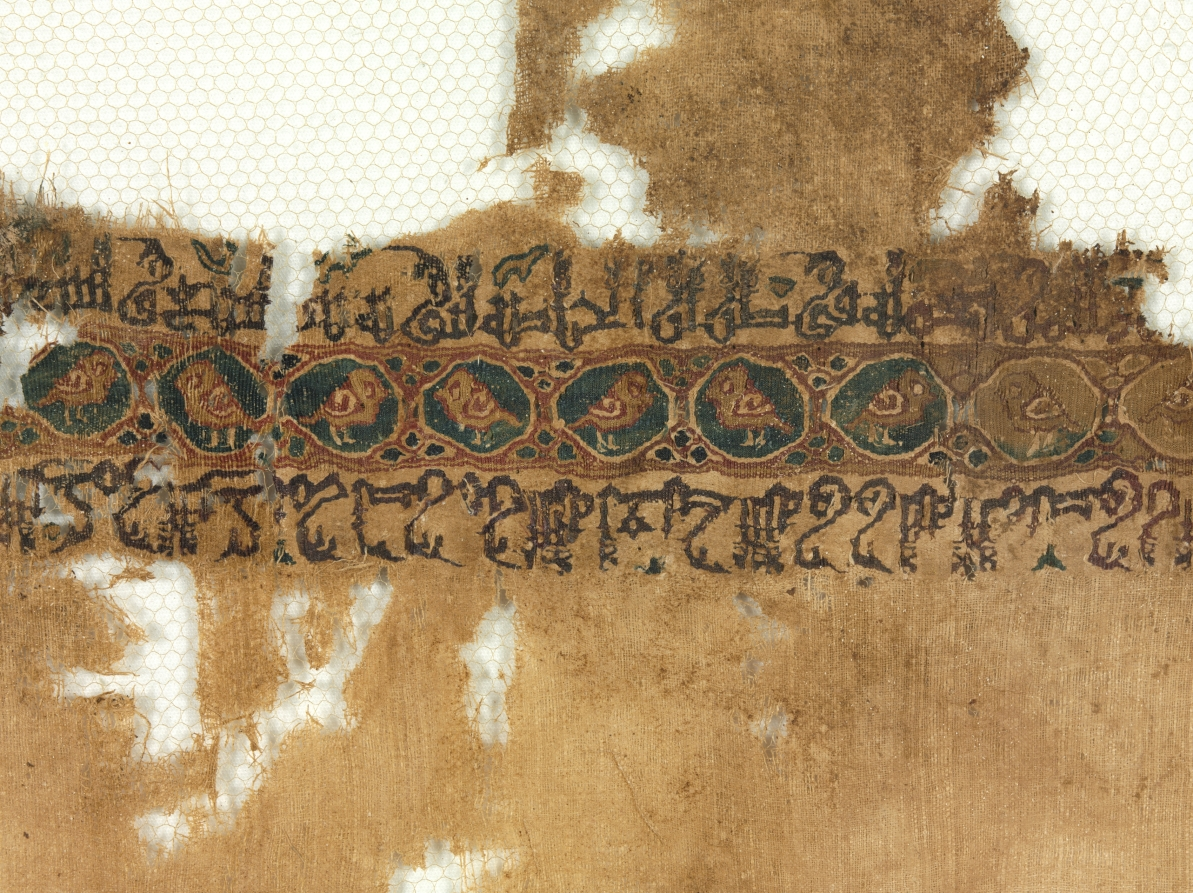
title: Fragment of a Tiraz, Probably the End of a Turban Cloth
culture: Egypt, Tunah, Fatimid period, Caliphate of al-Hakim, AH 399 (A.D. 1008-1009)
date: 1008 – 1009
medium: tabby ground with inwoven tapestry ornament; linen and silk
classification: Textile